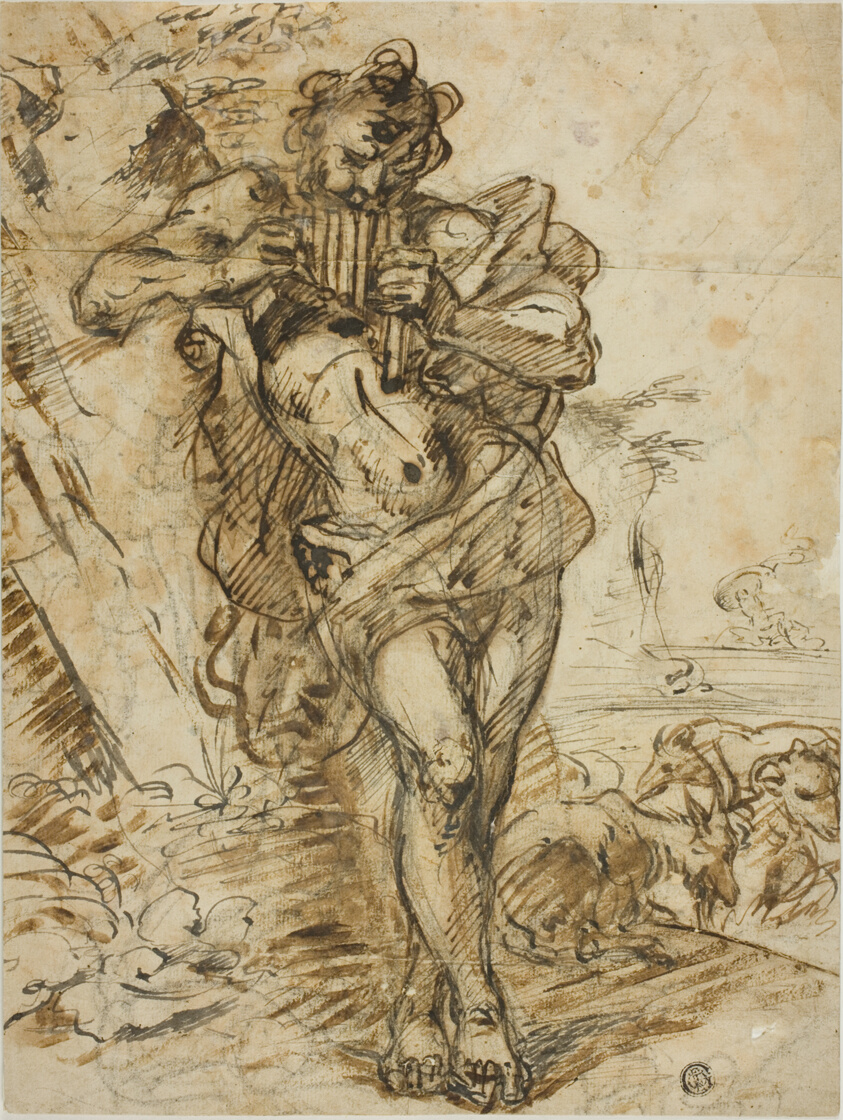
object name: Drawing and Watercolor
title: Pan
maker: Possibly a follower of Giovanni Benedetto Castiglione; Italian, 1609-1664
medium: Pen and iron gall ink, with brush and gray and brown wash, over black chalk, on ivory laid paper (pricked for transfer)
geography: Italy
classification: pen and ink drawings; drawings (visual works); prints and drawing